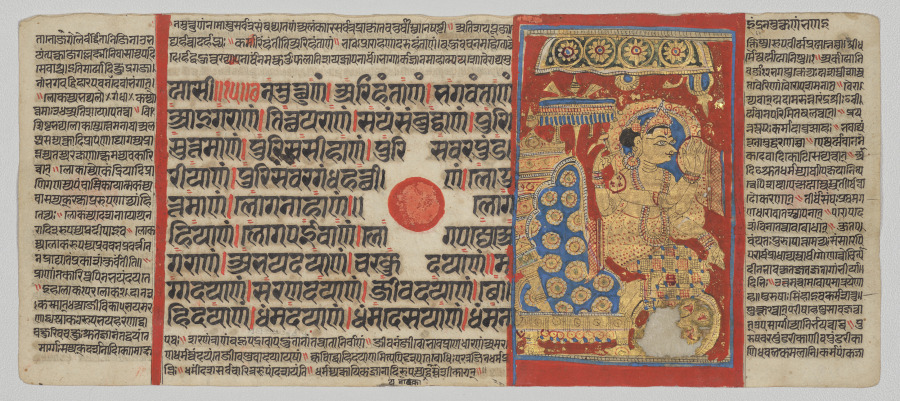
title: Indra Venerates the Embryo of Mahavira, Folio 7 (recto), from a Kalpa-sutra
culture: Western India, Gujarat, last quarter of the 15th century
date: c. 1475–1500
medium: Gum tempera, ink, and gold on paper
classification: Painting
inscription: [[upper right]] indra namuthhuṇaṃ bhaṇai